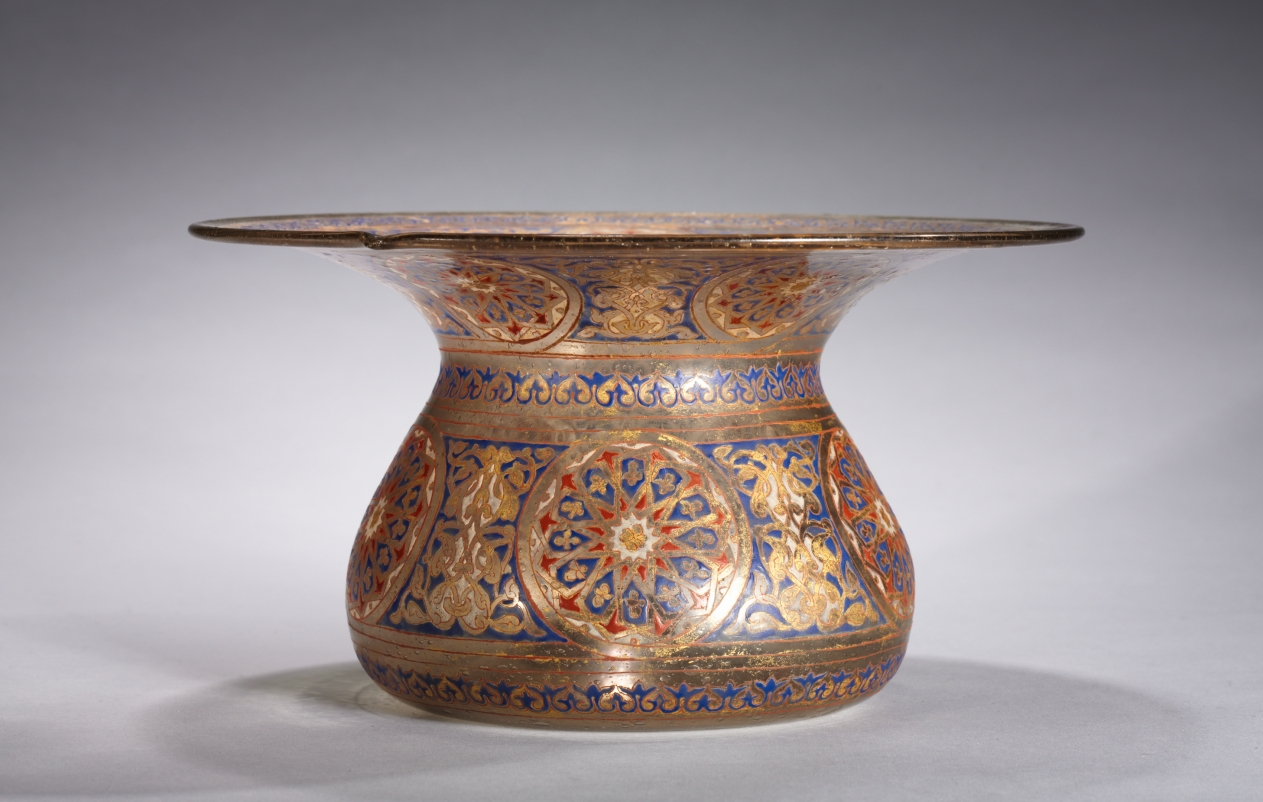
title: Ceremonial Spittoon or Basin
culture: Europe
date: late 1800s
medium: glass with enameled and gilded decoration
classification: Glass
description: This basin, as with the mosque lamp CMA 1981.10, is representative of reproductions of Mamluk glass that were prominent in the late 1800s in Europe during a period of resurgence of interest in Islamic art. At this time, collectors and artists revived the techniques of enameling and gilding that are hallmarks of Mamluk glass.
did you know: The intense enamel colors form striking star and leaf patterns.